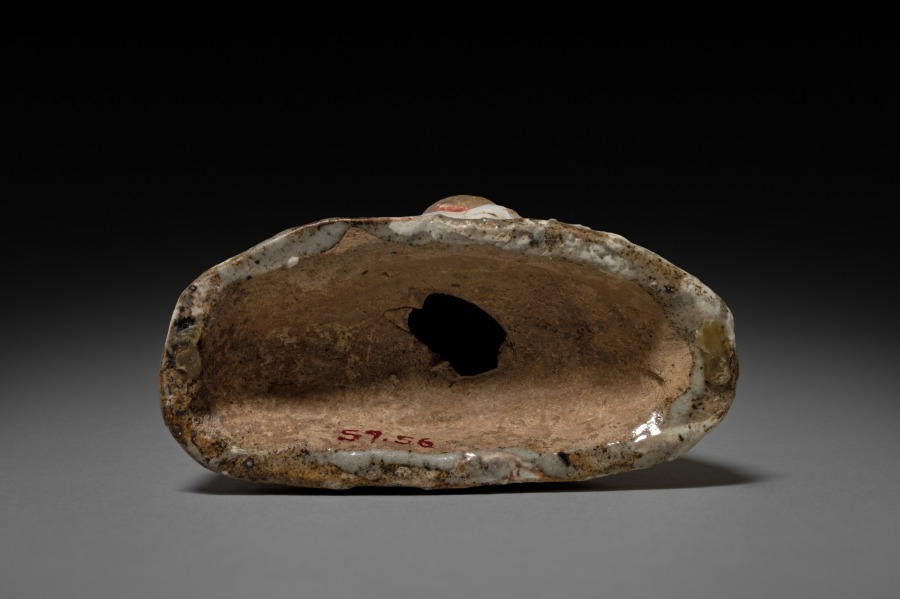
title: Lady Holding a Vase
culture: China, Northern Song dynasty (960-1127) - Jin dynasty (1115-1234)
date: 1100s–1200s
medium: Stoneware with slip decoration, Cizhou ware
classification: Ceramic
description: The Cizhou ware kilns never produced for the imperial court, but made potted utensils needed in daily life. They also fired ceramic figurines, which are believed to have been used as toys. The maid or palace lady here holds a long-necked vase of a type that watered flowers. The figurine, perhaps made as a toy for a girl, was molded in clay and covered with a white slip and transparent glaze, over which some colors in red, green, and ocher were applied. Cizhou kiln potters were one of the first in China who applied overglaze enamel-like colors on glazed, high-fired ceramics.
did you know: This hollow stoneware figure of a woman has firing hole visible at the bottom.